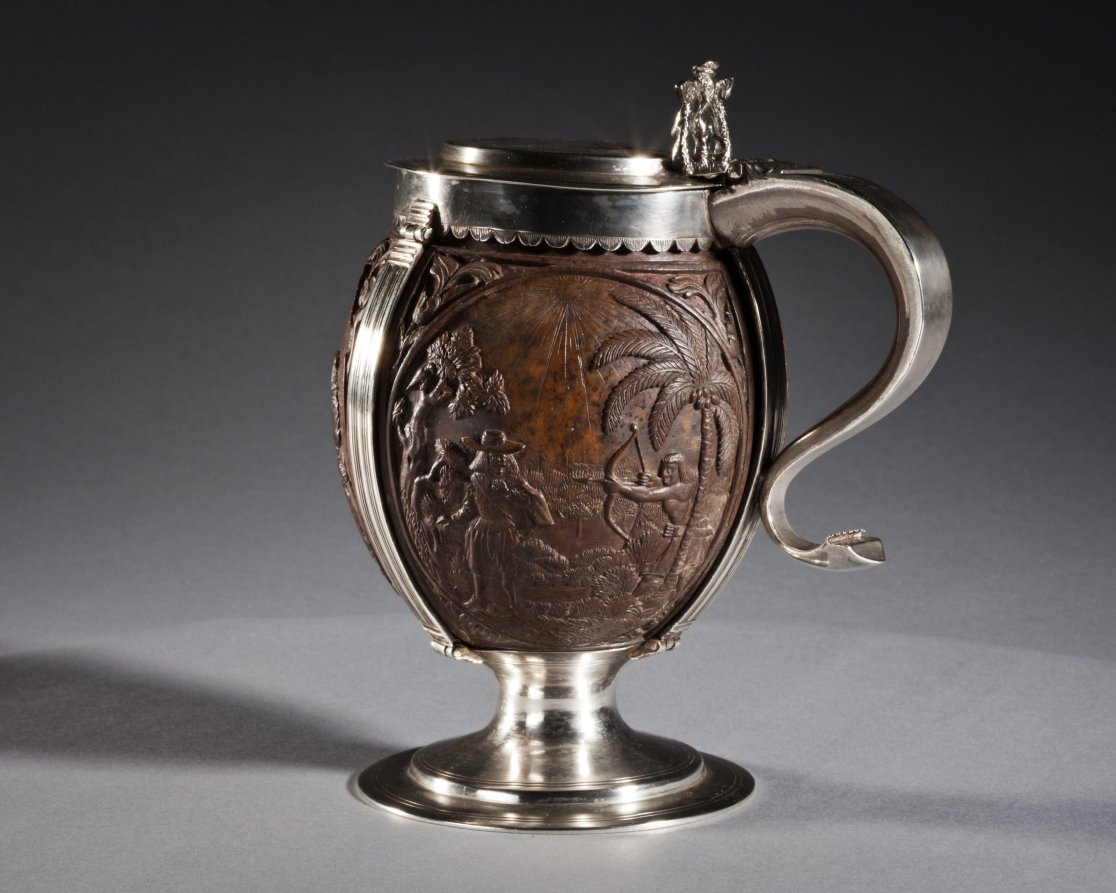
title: Coconut Cup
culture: carved coconut, probably The Netherlands; silver mount, probably England, 17th century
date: c. 1630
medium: carved coconut in silver mount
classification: Metalwork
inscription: top lid has engraved coat-of-arms, underside of lid has inscription: George Lewis TIVERTON Feby, 1st 1760.